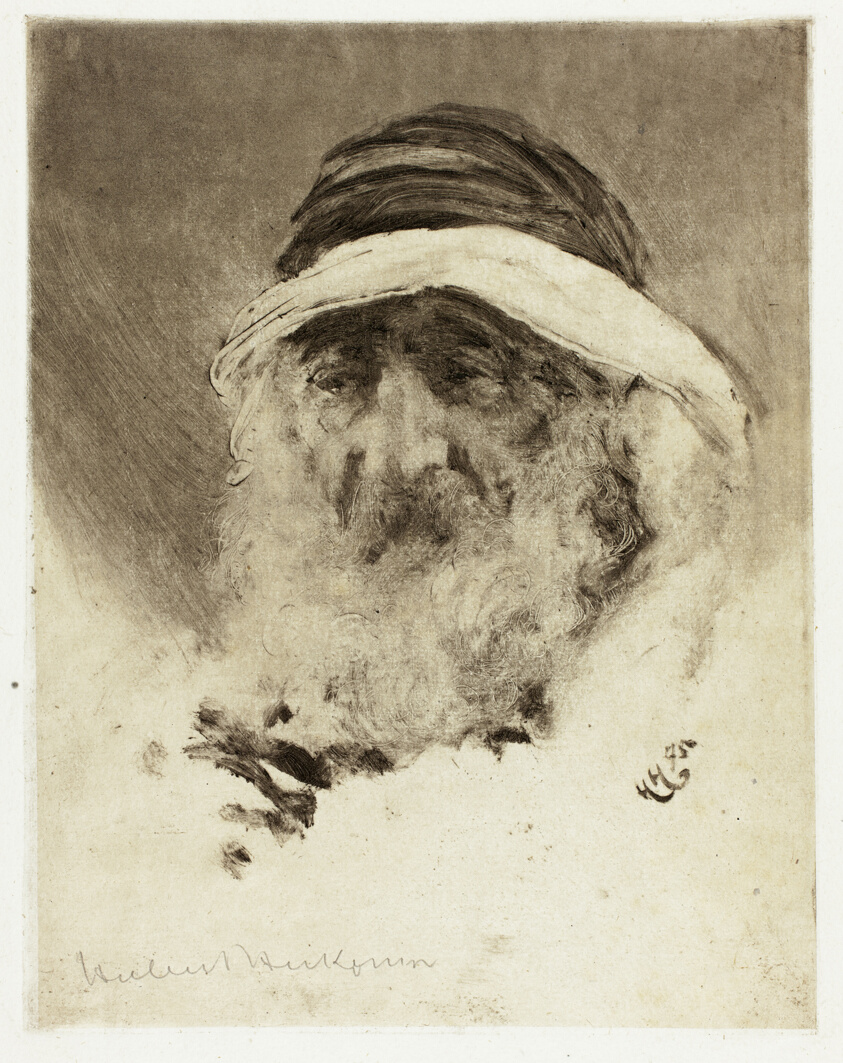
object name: Print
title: Study of an Arab Head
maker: Hubert Herkomer; English, 1849-1914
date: 1895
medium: Herkomergravure on cream laid paper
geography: England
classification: print; prints and drawing